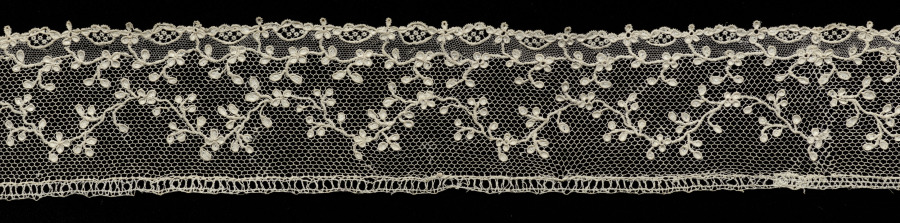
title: Lace Edging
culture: France, Argentan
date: 1715–74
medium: Linen: needle lace (Point de Argentan)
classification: Lace